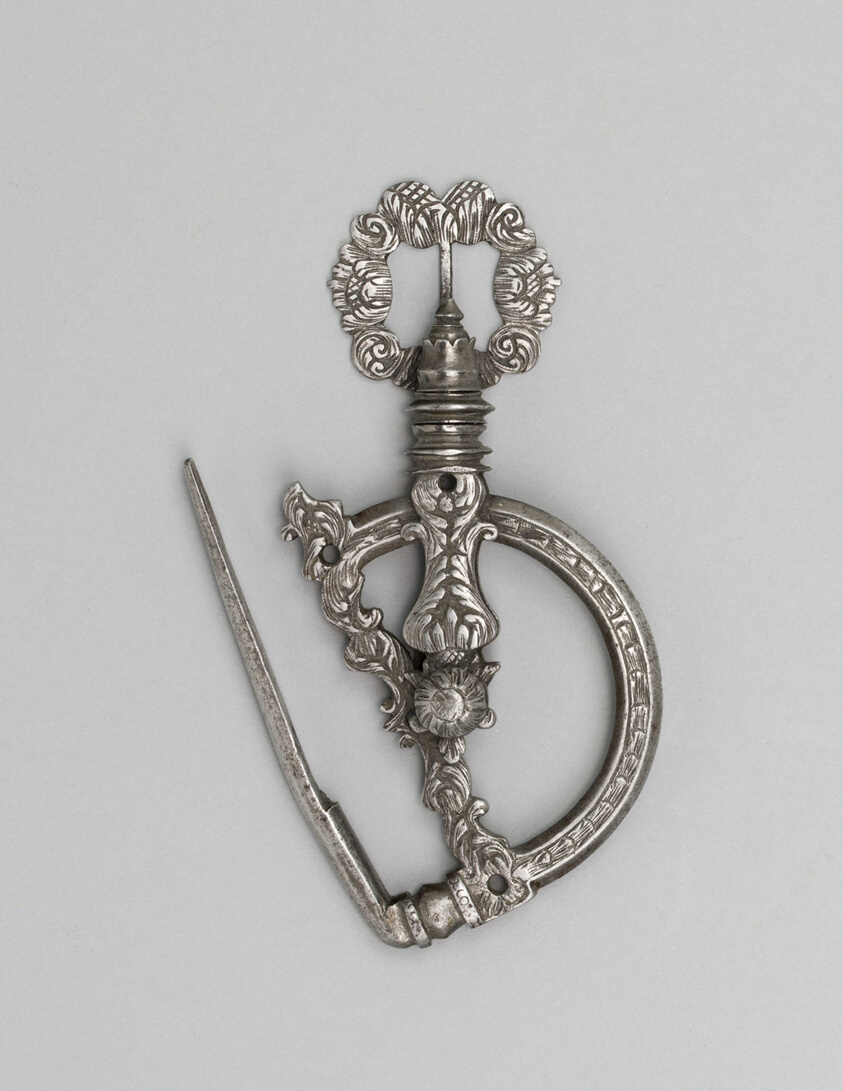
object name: Arms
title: Spring Attachment for Rapier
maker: Italian or Spanish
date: 1650/1700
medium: Iron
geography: Italy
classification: edged weapon-sword; arms; arms and armor